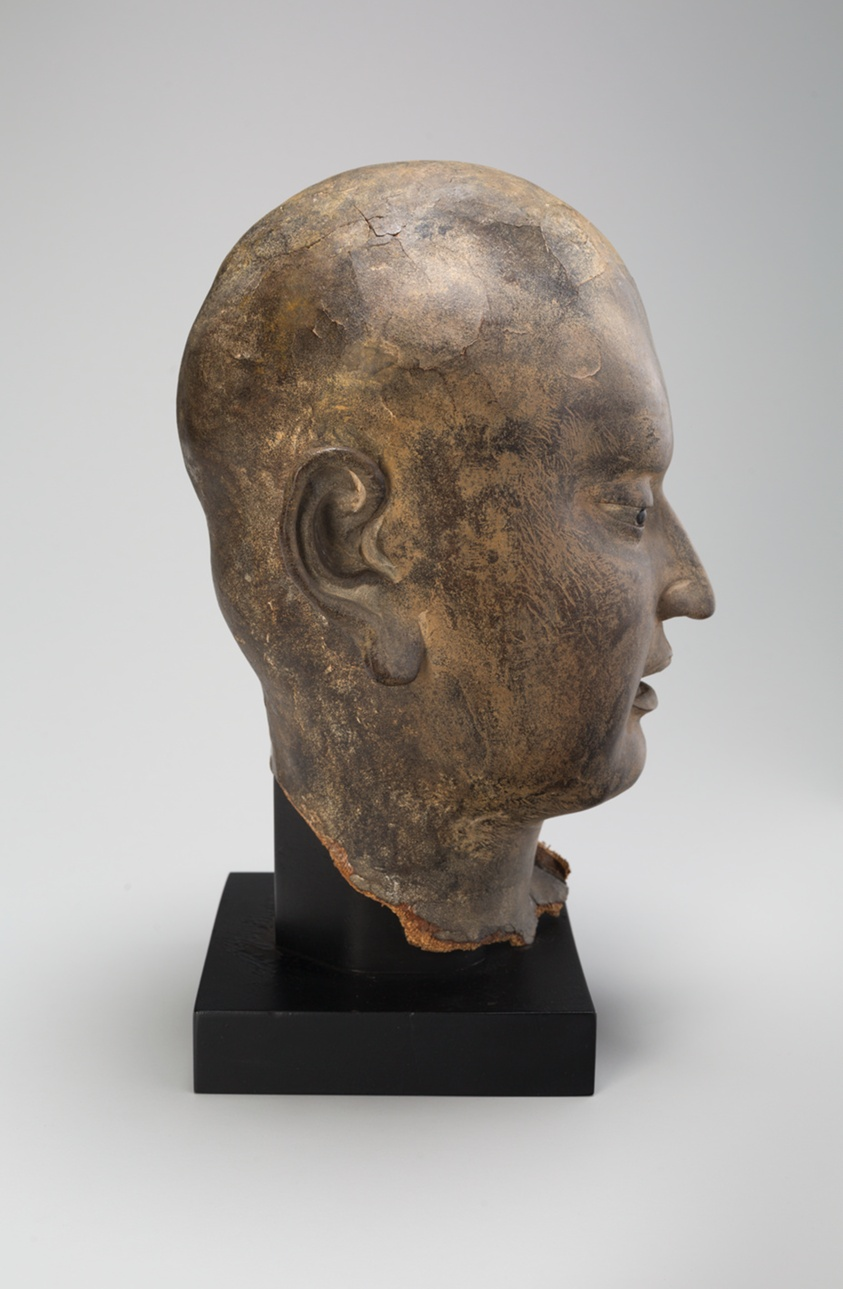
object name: Sculpture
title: Head of a Luohan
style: Chinese (culture or style), northern song, liao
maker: China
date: Northern Song, Liao, or Jin dynasty, c. 11th century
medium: Hollow dry lacquer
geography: China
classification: lacquer; sculpture; asian art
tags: heads, religion, religious figures, Buddhism, Chinese, portraits